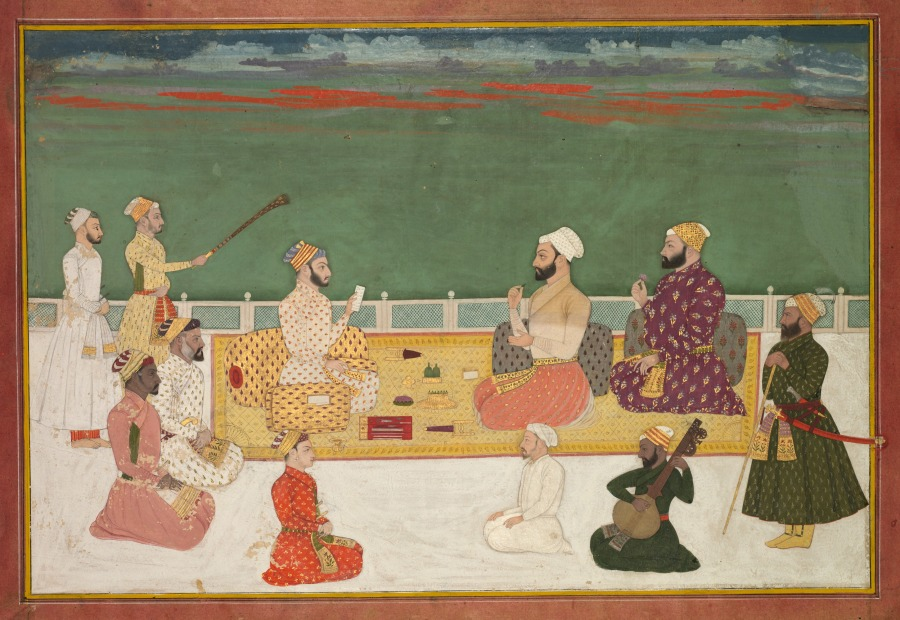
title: A Ruler Presents a Document to Visiting Nobles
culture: Mughal India, Deccan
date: c. 1700–1720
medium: Gum tempera and gold on paper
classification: Painting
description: Many carpets produced in the southwestern region of the Indian subcontinent feature a tone-on-tone mustard-yellow color scheme with lattice design. It demarcates the space of honor for the highest-ranking members of the refined gathering of literary connoisseurs. The figure facing right, with the peacock-feather whisk held over him, would be the host. He has a letter or poem in his hand. His guests have partaken of an aromatic betel-leaf packet (paan) and a rose from the dishes between them. Implements for writing and trimming paper lie on the carpet between a spittoon and courtly stabbing dagger (katar).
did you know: The figure in white has his mouth open, indicating that he is singing, accompanied by the musician behind him.